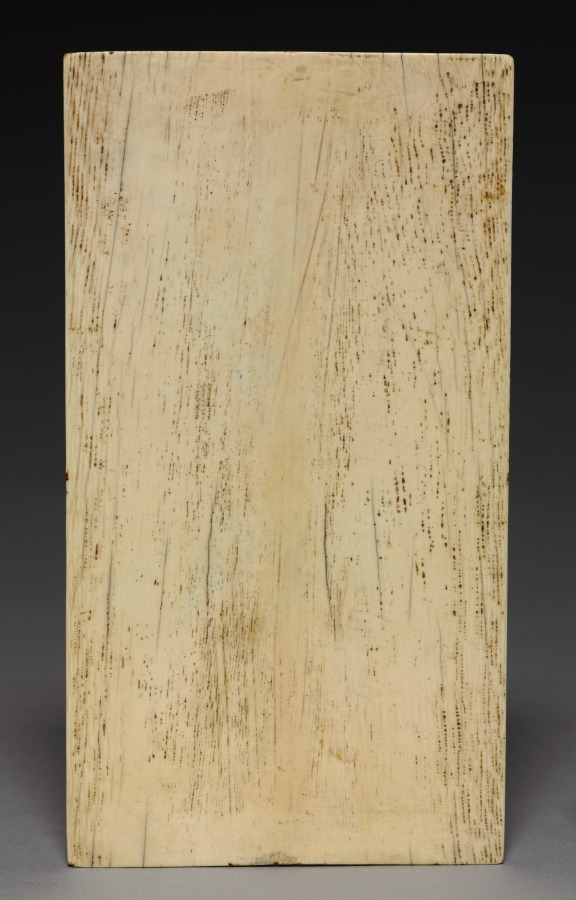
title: Diptych with Scenes from the Life of Christ (right wing: Entry into Jerusalem and Entombment)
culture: Germany, Thuringia or Saxony, 14th century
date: c. 1350–1375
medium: ivory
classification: Ivory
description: Ivory diptychs (two panels hinged together) were used for private devotion by their aristocratic owners. The scenes represented here are Christ’s Entry into Jerusalem, the Raising of Lazarus, the Crucifixion, and Christ’s Entombment. They suggest choices made by the original owner who wished to contemplate these aspects of Christ’s passion.